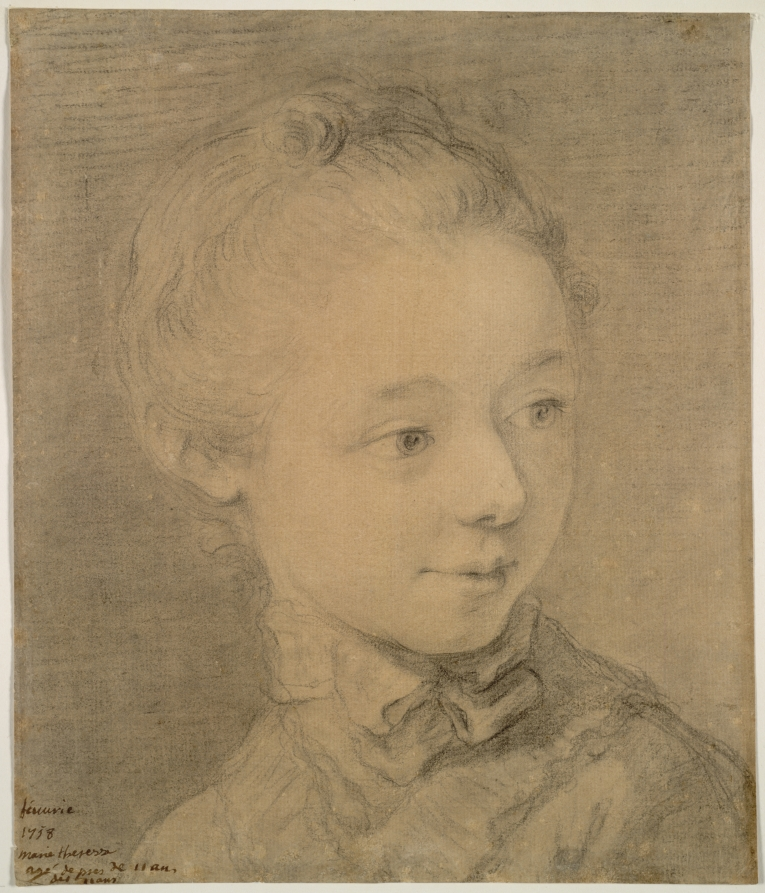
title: Head of a Young Girl Turning toward the Right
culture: France, 18th century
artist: attributed to François Hubert Drouais (French, 1727–1775)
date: 1758?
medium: black chalk, with stumping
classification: Drawing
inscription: lower left, in brown ink: [févrie?] / 1758 / marie theresse / agé de pres de 11 ans / des 11 ans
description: Although once attributed to the painter Louis Tocqué (1696-1772), this beautiful drawing of a young girl is closer to the work of another important portraitist of the 1700s, François-Hubert Drouais. The inscription at the lower left identifies the girl as a certain Marie-Thérèse, but this writing was probably added later, and we have no way of knowing for certain who she is.